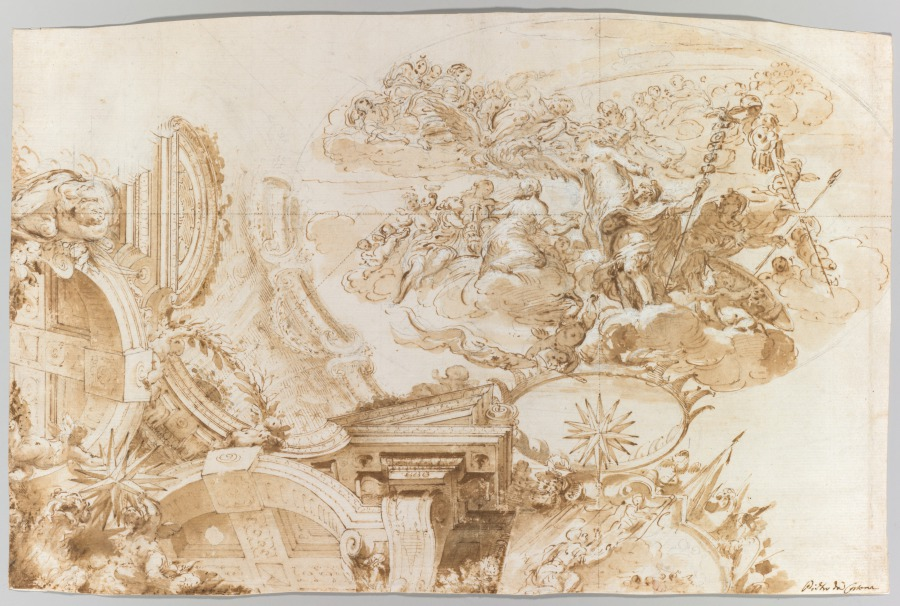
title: The Apotheosis of Romulus: Design for a Ceiling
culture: Italy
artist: Domenico Maria Canuti (Italian, 1625–1684)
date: c. 1675–76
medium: Black chalk, pen and brown ink, brush and brown wash, heightened with white, with perspectival indications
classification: Drawing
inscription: Lower right, in black ink: Pietro da Cortona; watermark: Orsini Arms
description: Domenico Maria Canuti made this design for a quadratura ceiling fresco in preparation for a commission at the Palazzo Altieri in Rome. Quadratura describes painting in which architectural elements are painted to appear to be part of the real architectural setting. Canuti focused on establishing the visual coherence between the figures, portraying the deification of Rome’s founder, and the painted architecture by drawing perspective lines at 90-degree and 45-degree angles. The perfectly rendered 24-point stars at the edge of the painted architecture were emblems of the Altieri family.